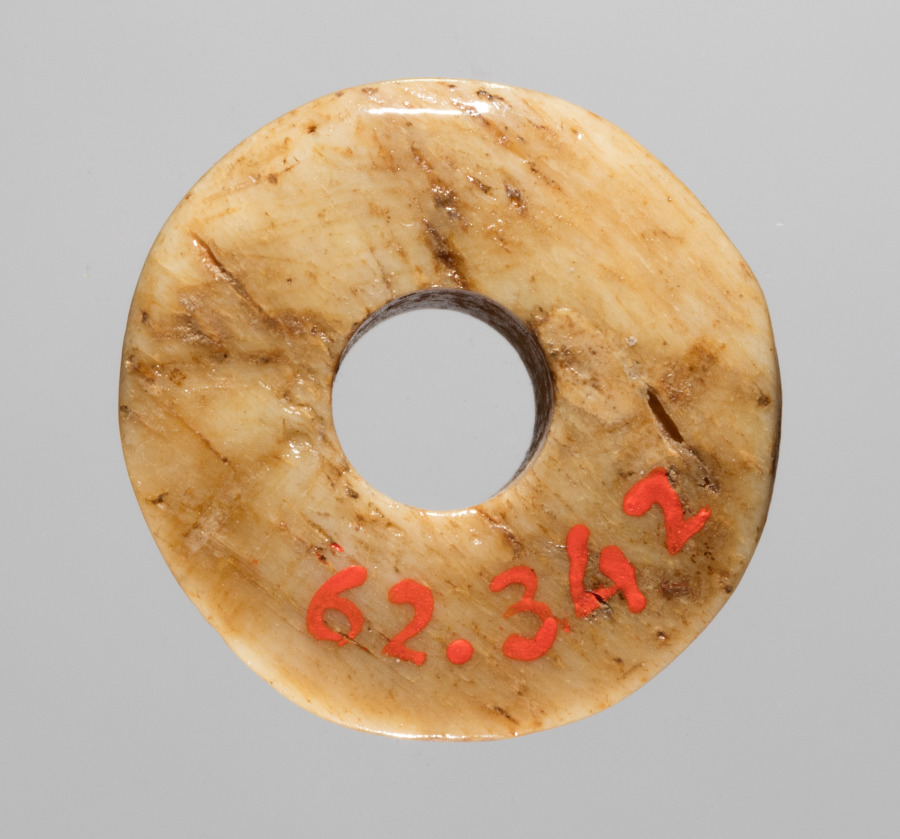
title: Spindle Whorl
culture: Iran, early Islamic period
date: 700s - 900s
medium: bone, incised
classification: Spindle Whorl